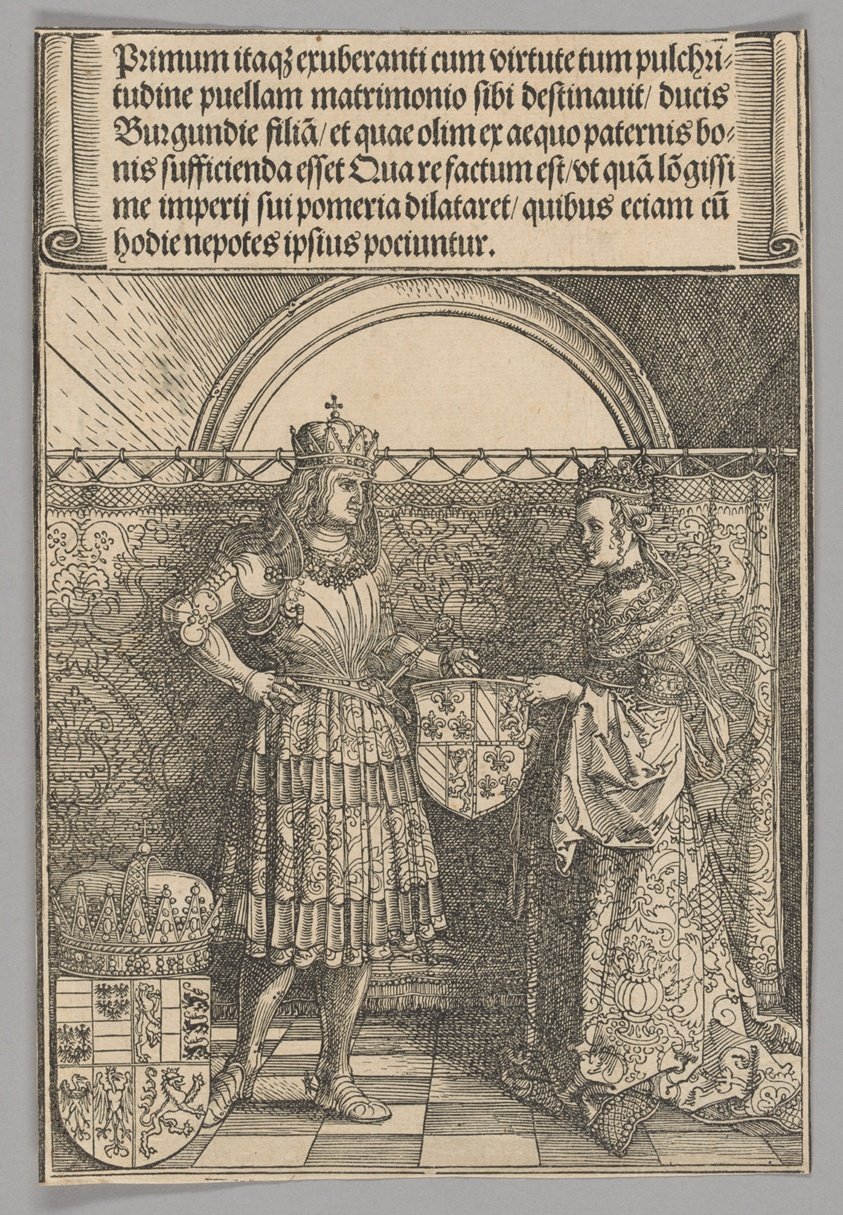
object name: Print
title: Maximilian and Maria of Burgundy, plate 2 from Historical Scenes from the Life of Emperor Maximilian I from the Triumphal Arch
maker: Albrecht Dürer (German, 1471-1528); printed by Hieronymus Andreae (German, died 1556)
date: 1515-17, printed c. 1520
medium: Woodcut in black ink on cream laid paper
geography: Germany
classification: woodcut; paper; print; prints and drawing